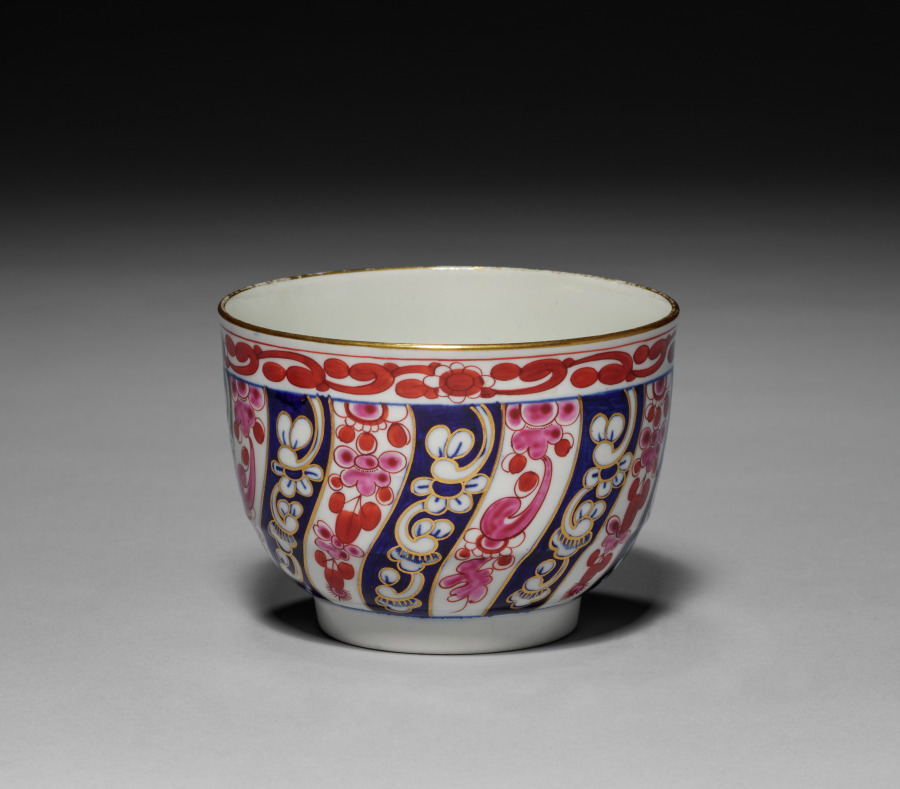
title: Bowl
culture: England, 18th century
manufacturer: Worcester Porcelain Factory (British, established 1751)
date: c. 1770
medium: porcelain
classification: Ceramic